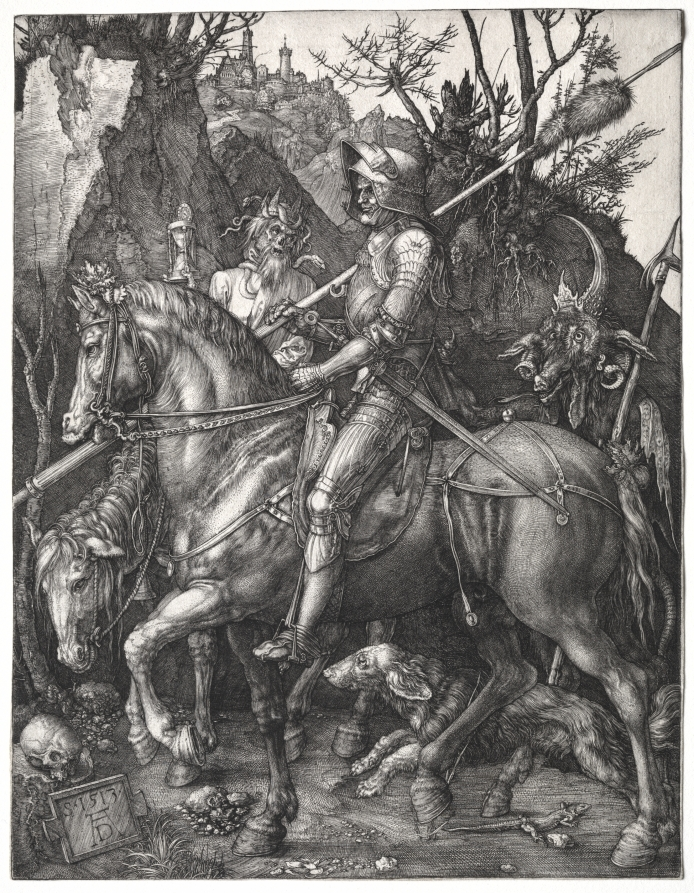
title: Knight, Death, and the Devil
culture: Germany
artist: Albrecht Dürer (German, 1471–1528)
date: 1513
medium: engraving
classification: Print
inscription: lower left, in plate: S ·1513· / AD[in monogram] ; VERSO, lower left, in graphite: x 29.9 ; lower right, in graphite: B. 98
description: In this tour de force engraving, considered one of his three greatest “masterworks,” Albrecht Dürer portrayed a mounted soldier who resolutely forges through a dark gorge, ignoring a horned devil in his path. Confronted by Death itself, crowned with snakes and holding an hourglass indicating mortality, the soldier and his faithful dog demonstrate the strength of righteousness required to stay upon the right path. The skull underfoot suggests that others have not been so resolute. Indeed, this road of life is full of obstacles, with the city on the hill accessible, it seems, only by way of treacherous peaks.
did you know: The personification of Death in this image holds an hourglass whose sands are exactly half full, which may indicate a turning point in the rider's life choices.